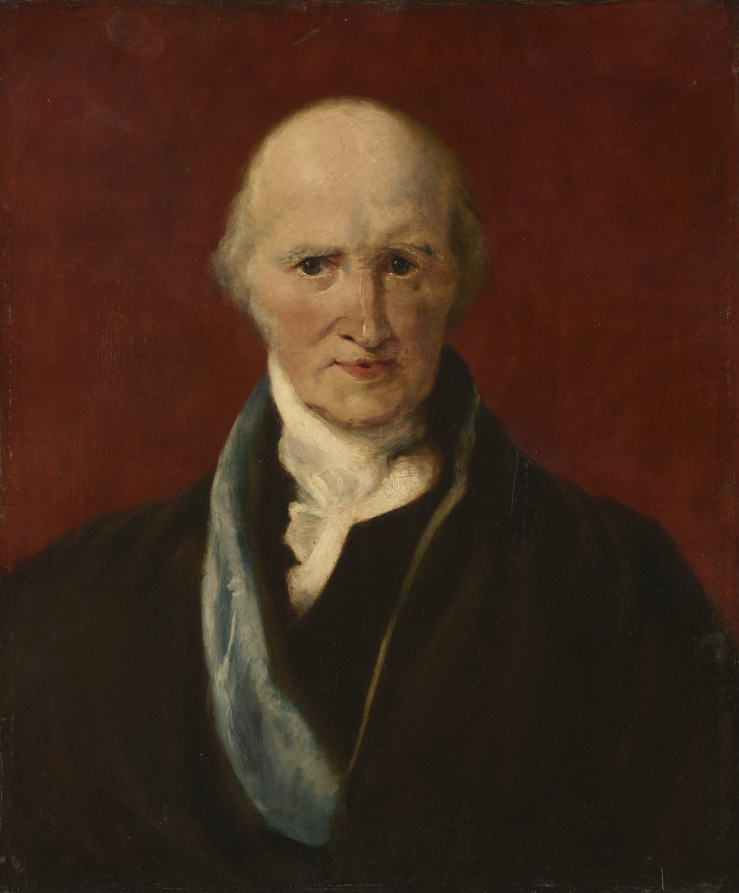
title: Portrait of Benjamin West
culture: England, 18th century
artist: copy after Thomas Lawrence (British, 1769–1830)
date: 1818 or later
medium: oil on canvas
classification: Painting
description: This bust-length portrait of the prominent American artist, Benjamin West, was allegedly painted by Thomas Lawrence. Although its attribution remains uncertain, the portrait's style and execution recalls other portraits of West by Lawrence, including the full-length painting now in the National Gallery, London. This smaller version may have been created when West was at an advanced age, and no longer able to stand for extended periods of time. However, as an exact, yet more freely painted likeness of the London portrait, this version also may be a copy made by Lawrence or one of his pupils after the full-length version.